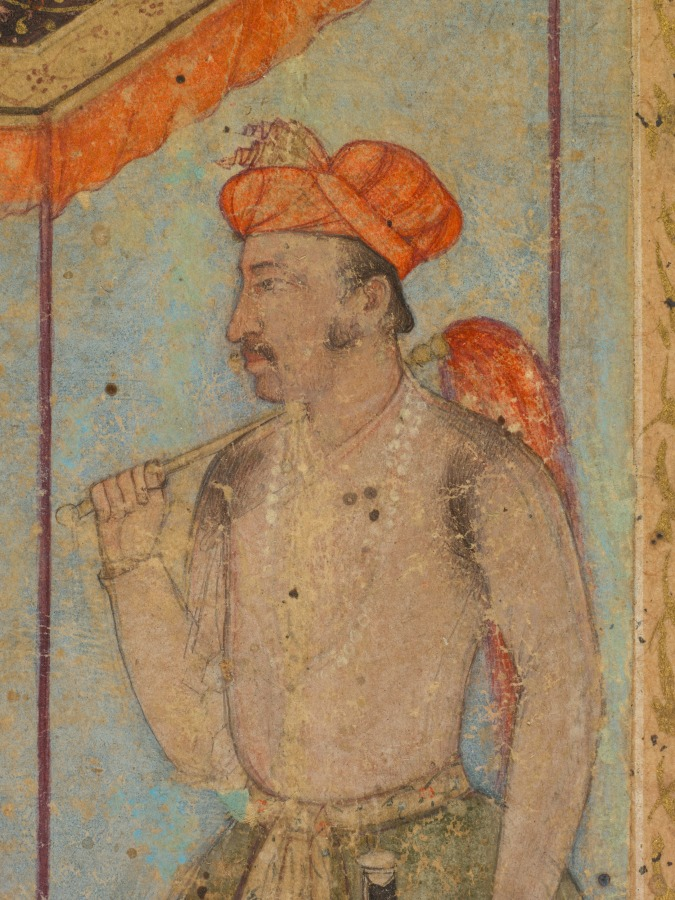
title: Akbar and Jahangir Examine a Ghir Falcon while Prince Khusrau Stands Behind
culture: Mughal India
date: c. 1602–4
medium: gum tempera and gold on paper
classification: Painting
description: Emperor Akbar sits against a purple bolster under a canopy looking aged and careworn, probably not long before his death. He examines a trained falcon of the type that the Mughals used in hunting. This falcon appears to be from Akbar’s son, Prince Salim, who stands before him in a gesture of gift-giving. A stately black antelope, a wild animal now a pet, harnessed and wearing a bell, crouches at the foot of the steps leading up to the canopied platform.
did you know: Salim rests his hand on a sharply pointed dagger in a red velvet sheath.